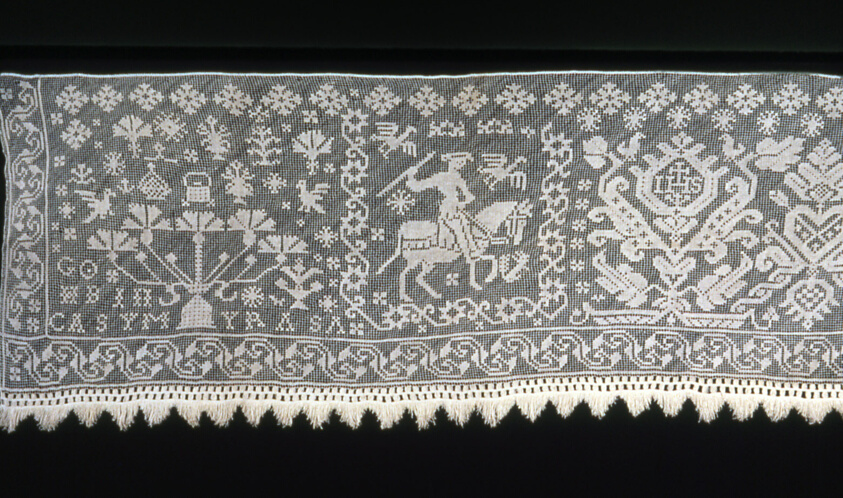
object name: Religious/Ritual Object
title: Altar Frontal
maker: Italy or Spain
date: 17th/18th century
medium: Linen, knotted square netting; embroidered with linen in cloth stitch (lacis); heading of bobbin-made cloth stitch tape; edged with linen in warp-faced plain weave extended weft, open warp uncut fringe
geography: Italy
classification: textile; needlework (visual works); ritual objects